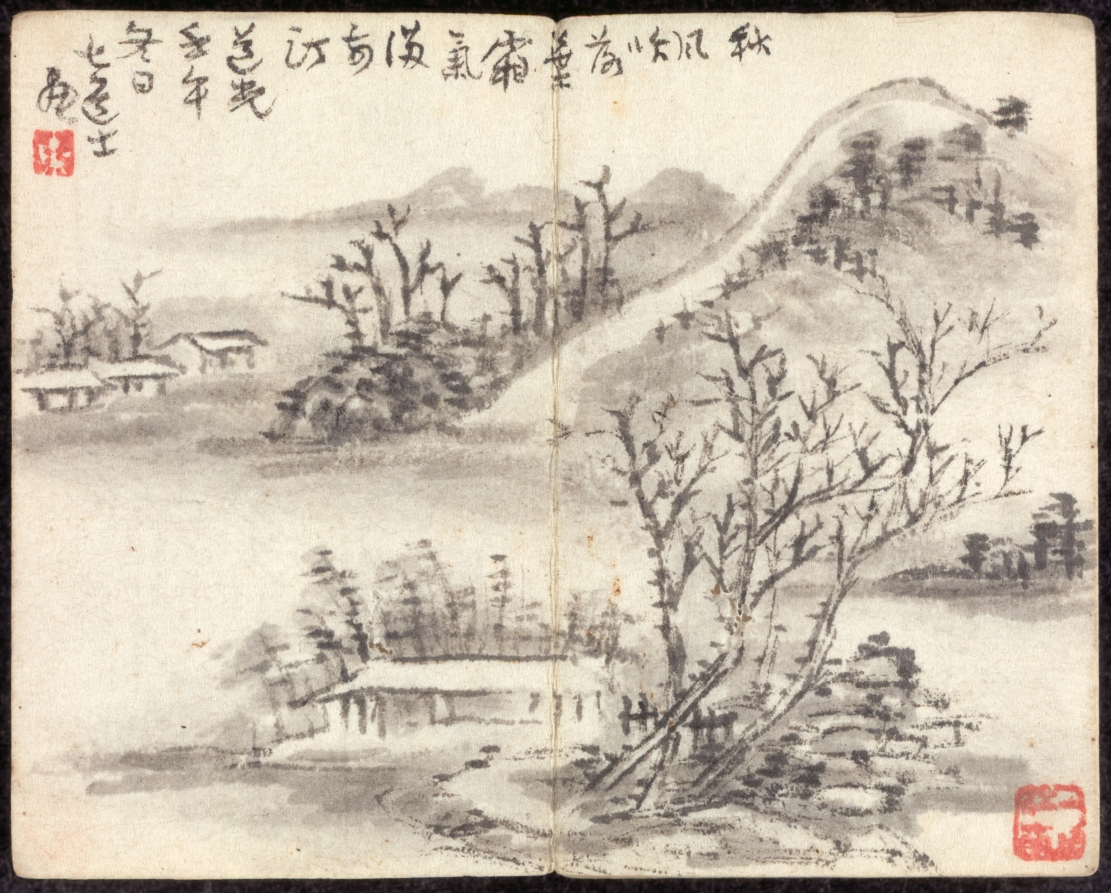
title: Miniature Album with Figures and Landscape (Landscape with Hill)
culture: China, Qing dynasty (1644–1911), Qianlong reign (1736–95)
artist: Zeng Yandong (Chinese, c. 1751–1827)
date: 1822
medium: album leaf, ink and color on paper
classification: Painting